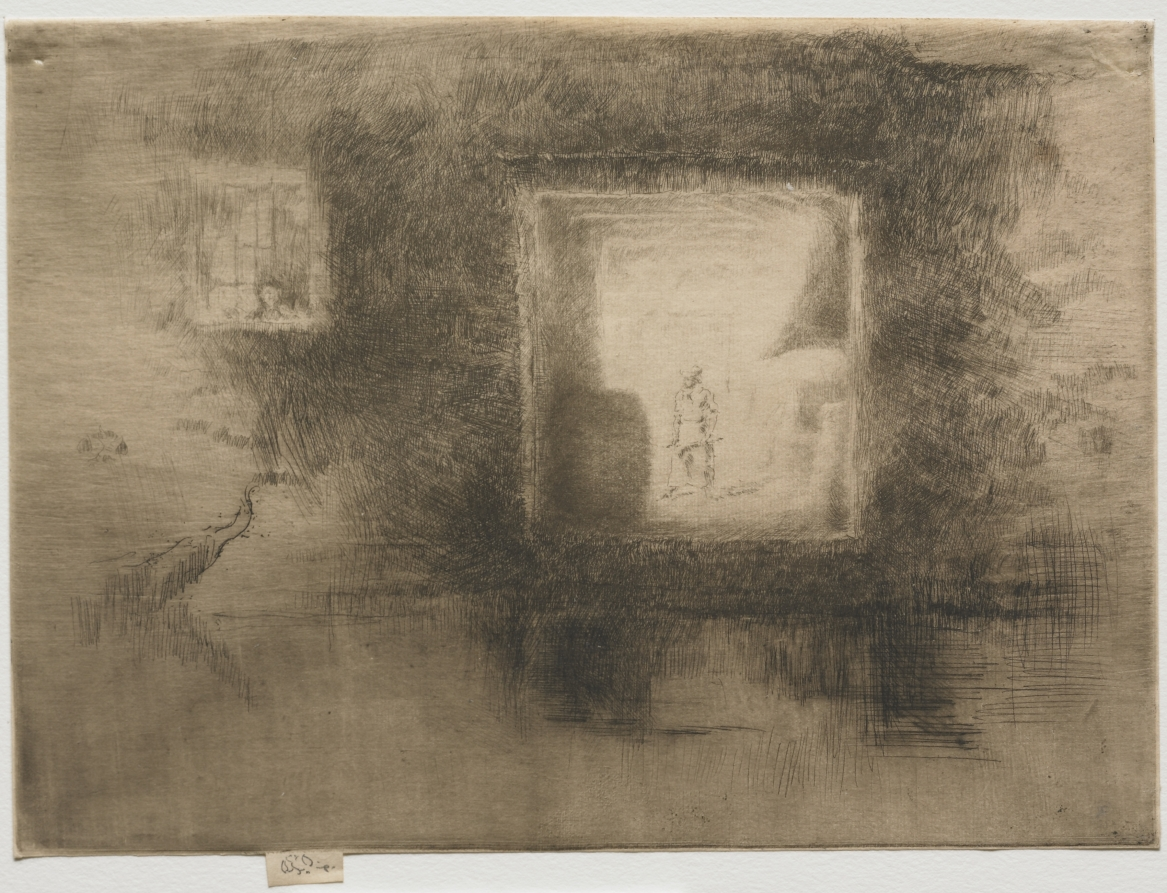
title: Nocturne Furnace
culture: America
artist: James McNeill Whistler (American, 1834–1903)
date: 1879–80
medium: etching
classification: Print